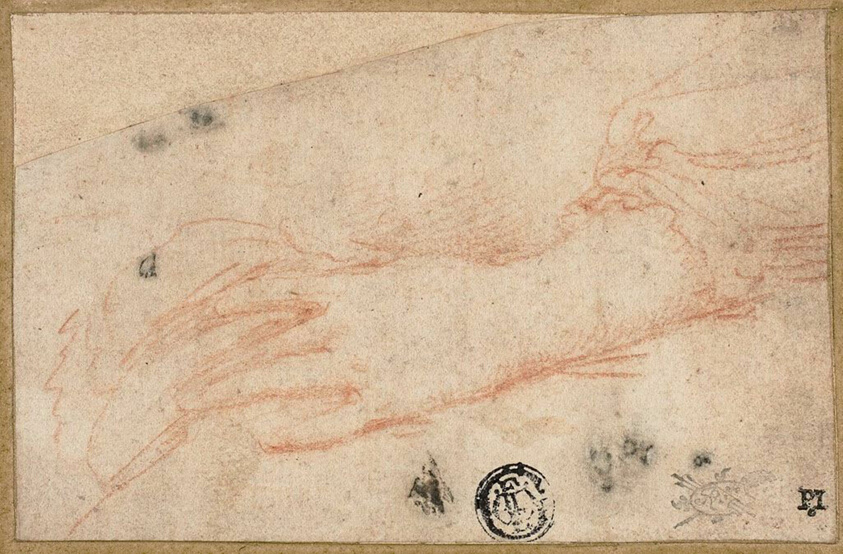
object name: Drawing and Watercolor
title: Sketch of Left Hand and Wrist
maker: Francesco Mazzola, called Parmigianino; Italian, 1503-1540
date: 1535/40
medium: Red chalk on ivory laid paper, laid down on cream laid paper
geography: Italy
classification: chalk; drawings (visual works); prints and drawing